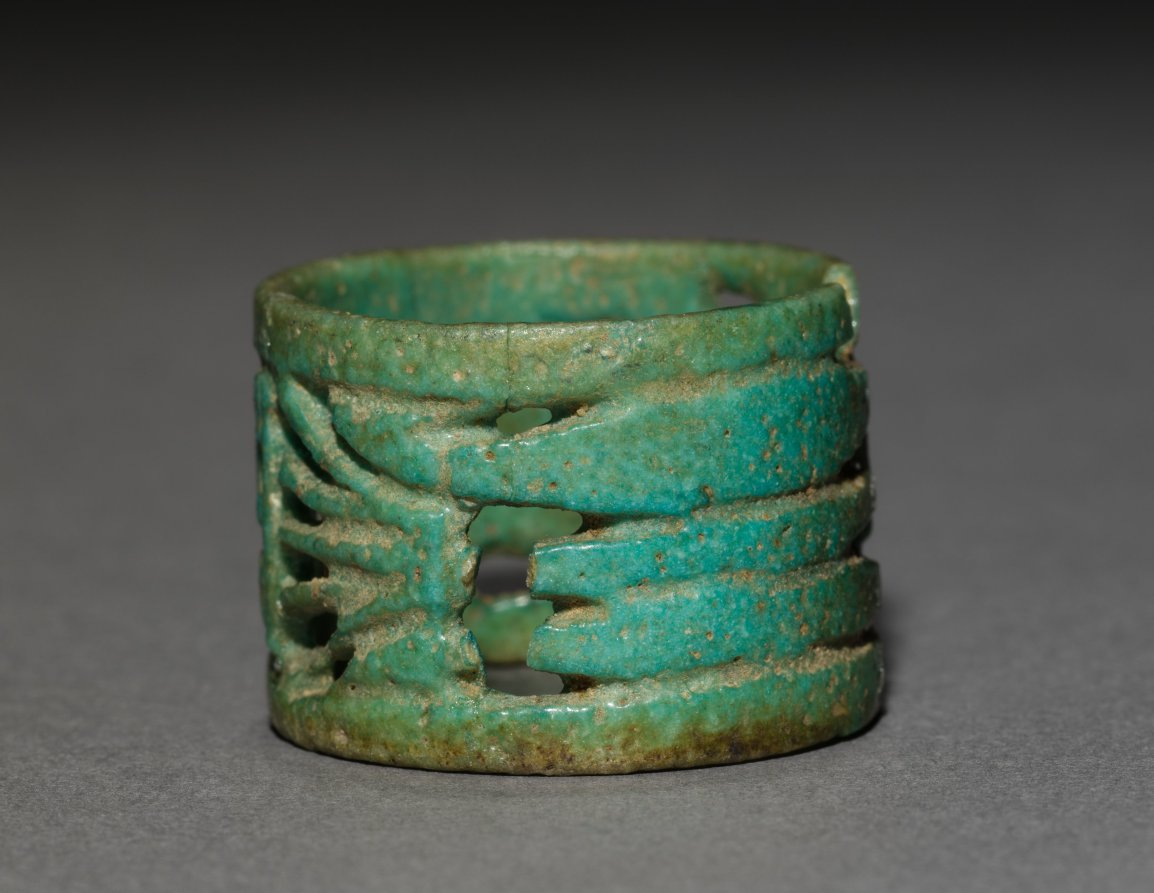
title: Openwork Ring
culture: Egypt, Third Intermediate (1069–715 BCE), Dynasties 21–22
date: 1069–715 BCE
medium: turquoise faience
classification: Jewelry